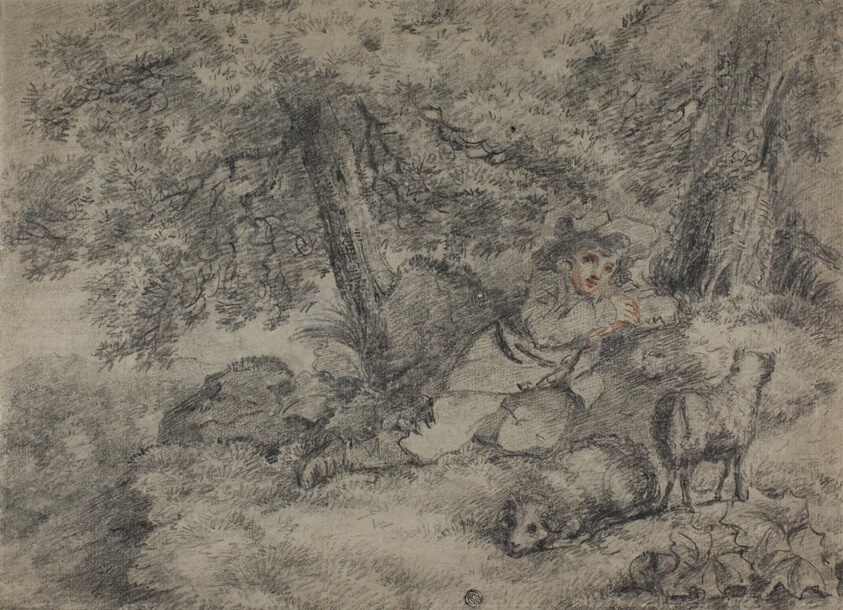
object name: Drawing and Watercolor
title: Shepherd Boy with Lambs in Woods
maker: George Morland (English, 1763-1804)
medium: Black and red chalk on cream laid paper, laid down on board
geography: England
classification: chalk; drawings (visual works); prints and drawing